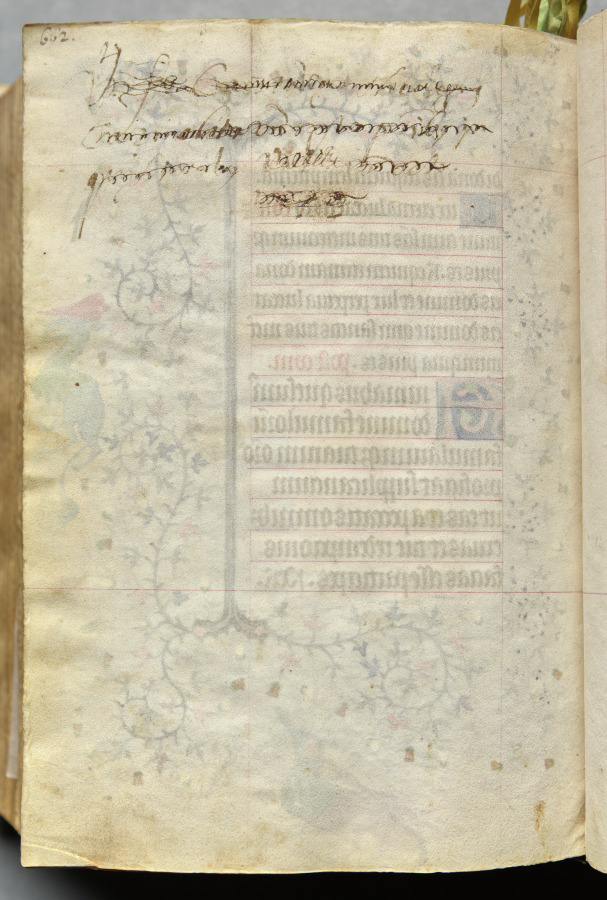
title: Hours of Charles the Noble, King of Navarre (1361-1425), fol. 325v, Text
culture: France, Paris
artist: Master of the Brussels Initials and Associates (French)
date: c. 1405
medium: ink, tempera, and gold on vellum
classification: Bound Volume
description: This precious volume was obviously highly prized by its owner, the French-born King of Navarre, who had his coat of arms painted on no less than twenty folios. Rather than directly commissioning this manuscript from a specific workshop, it seems that Charles the Noble acquired his book of hours -- perhaps ready-made for the luxury market -- while on a trip to Paris in 1404-05. A collaborative effort, six painting styles are evidenced within the pages of this codex, those of two Italians, two Frenchmen, and two Netherlanders. The painter who was responsible for the planning and decoration of the book, and who produced seventeen of the large miniatures, was a Bolognese artist known as the Master of the Brussels Initials. His principal assistant, responsible for most of the borders, was a Florentine who signed his name "Zecho" da Firenze on folio 208 verso.